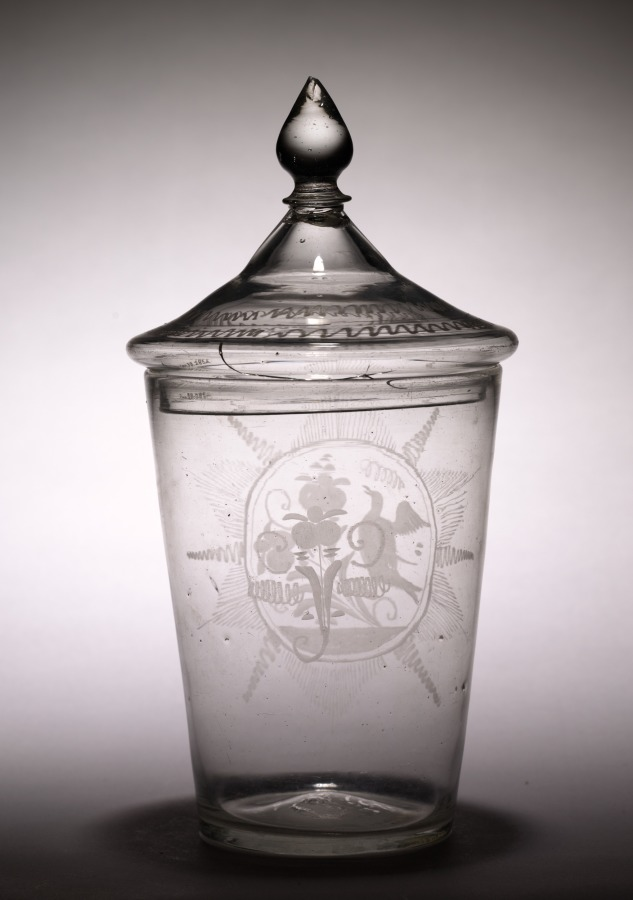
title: Flip Glass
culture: America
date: late 1700s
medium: glass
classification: Glass